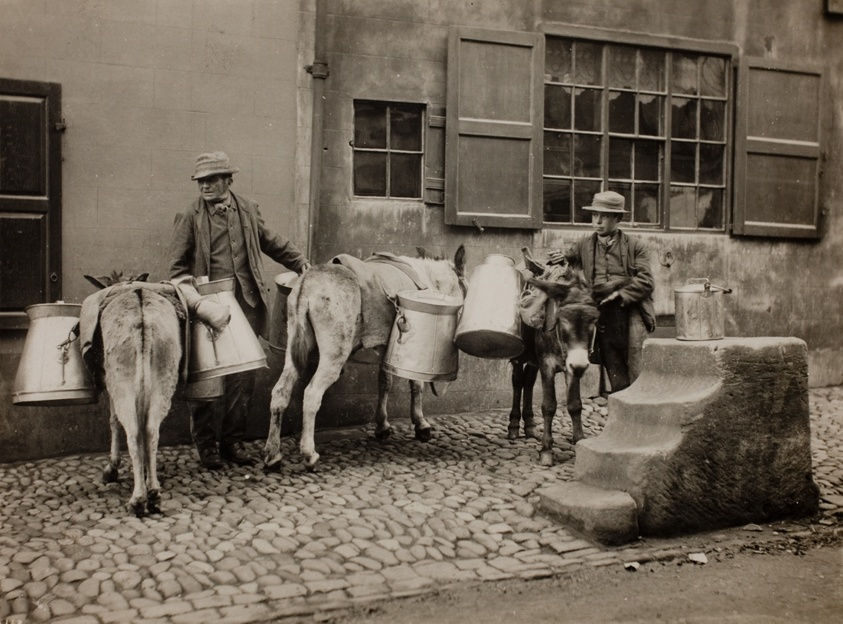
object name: Photograph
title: Milk Donkeys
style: 19th century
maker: Frank Meadow Sutcliffe (English, 1853–1941)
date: c. 1890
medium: Platinum print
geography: England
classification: photograph; photography